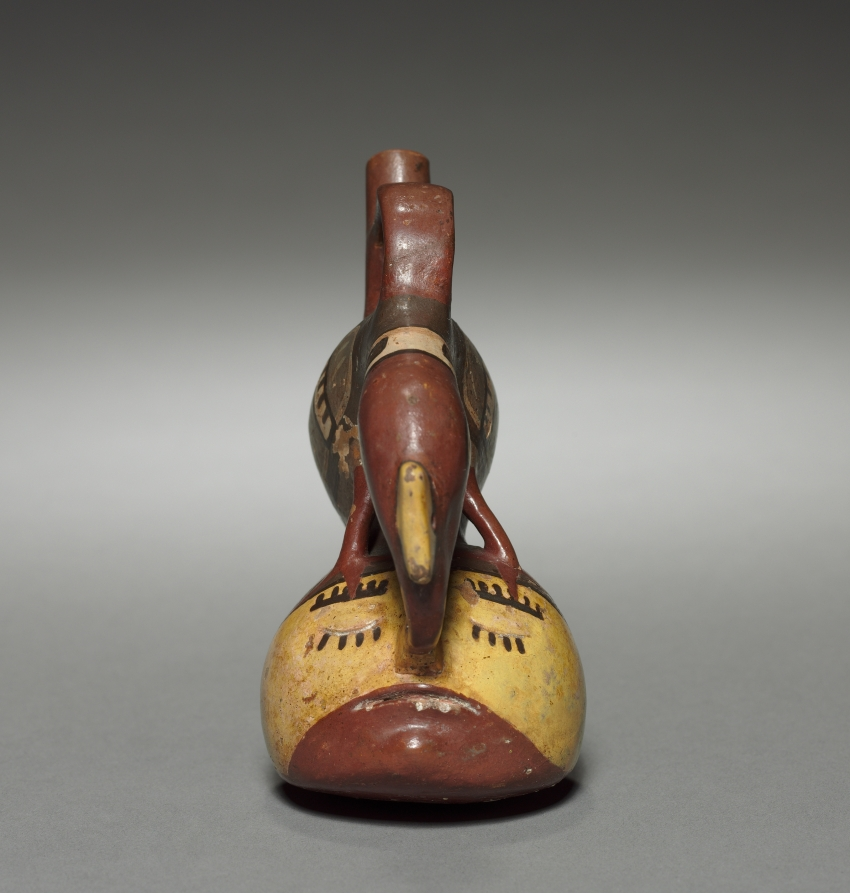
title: Vessel with Condor and Human Head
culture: Peru, Tiwanaku style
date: 400–1000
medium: pottery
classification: Ceramic